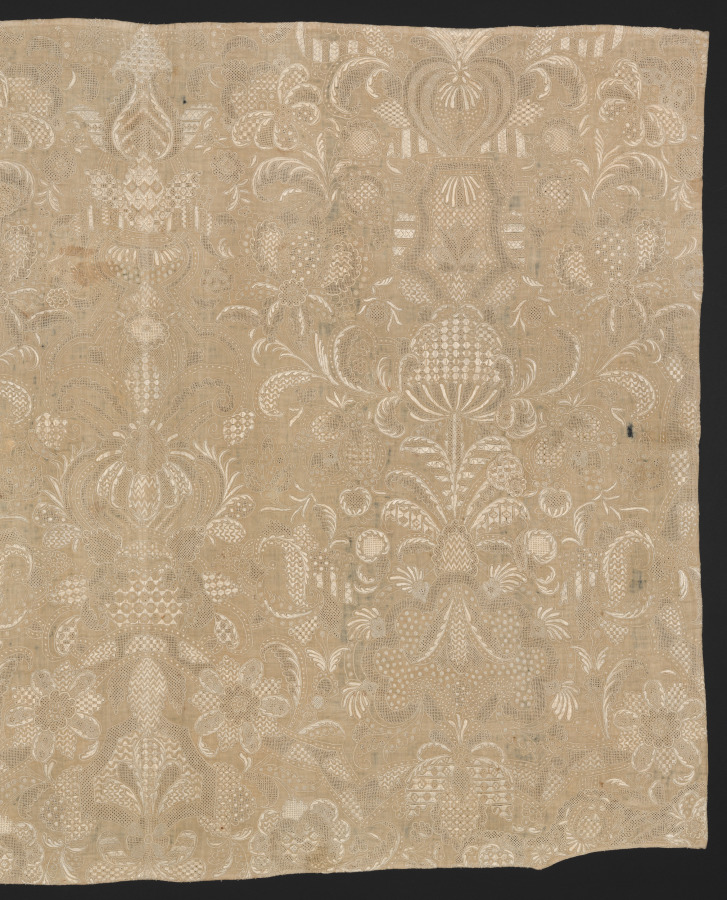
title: Fragment of Embroidered Cloth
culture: England or Ireland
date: 1700s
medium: Twill weave cotton: embroidered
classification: Embroidery